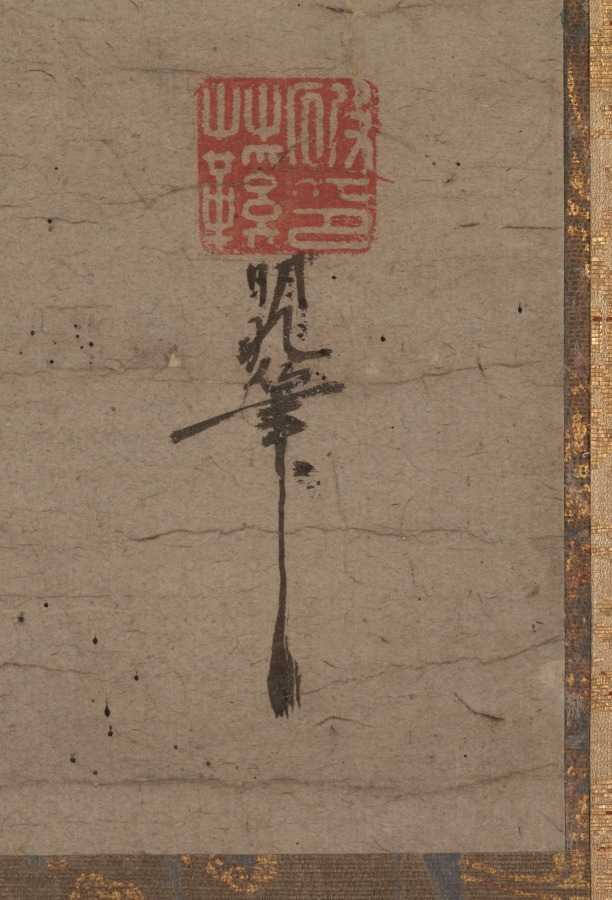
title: Hotei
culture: Japan, Muromachi period (1392–1573)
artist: Kichizan Minchō (Japanese, 1352–1431)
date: late 1300s–early 1400s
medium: hanging scroll; ink and slight color on paper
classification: Painting